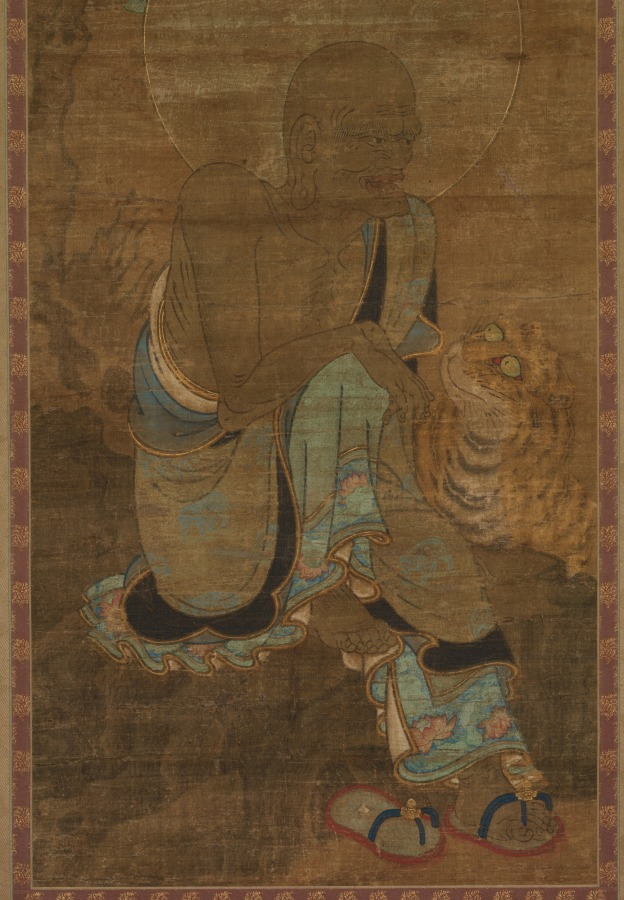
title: Rakkan (Arhat)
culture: Japan, Kamakura period (1185–1333) to Nanbokuchō period (1336–92)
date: 1300s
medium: hanging scroll; ink, color, and cut gold (kirikane) on silk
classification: Painting